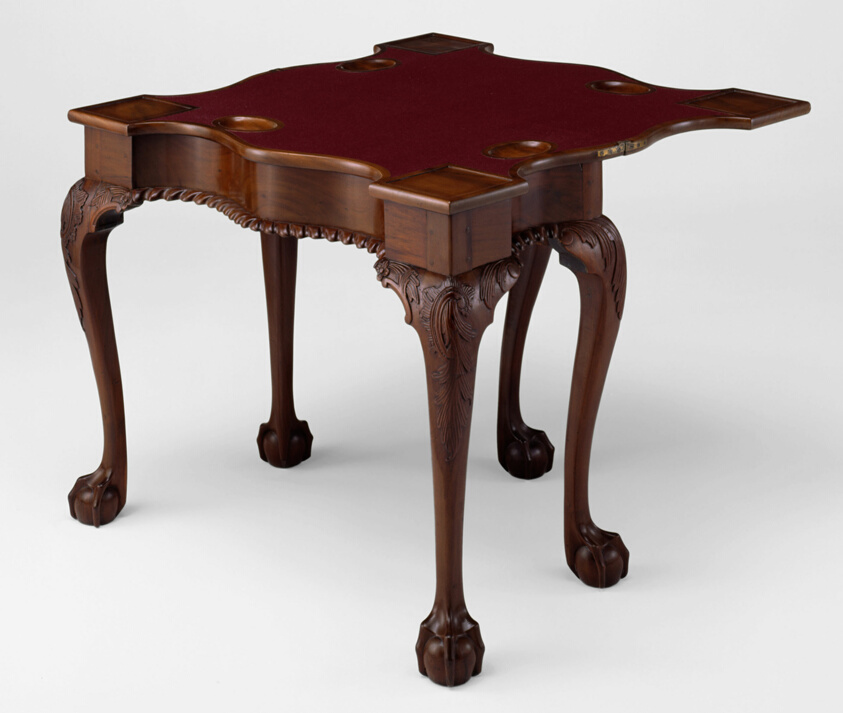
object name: Furniture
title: Card Table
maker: Artist unknown (American, 18th century); New York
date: 1755–90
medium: Mahogany with tulip poplar, white oak, and white pine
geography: New York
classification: table; furniture; american decorative arts; american arts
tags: furniture